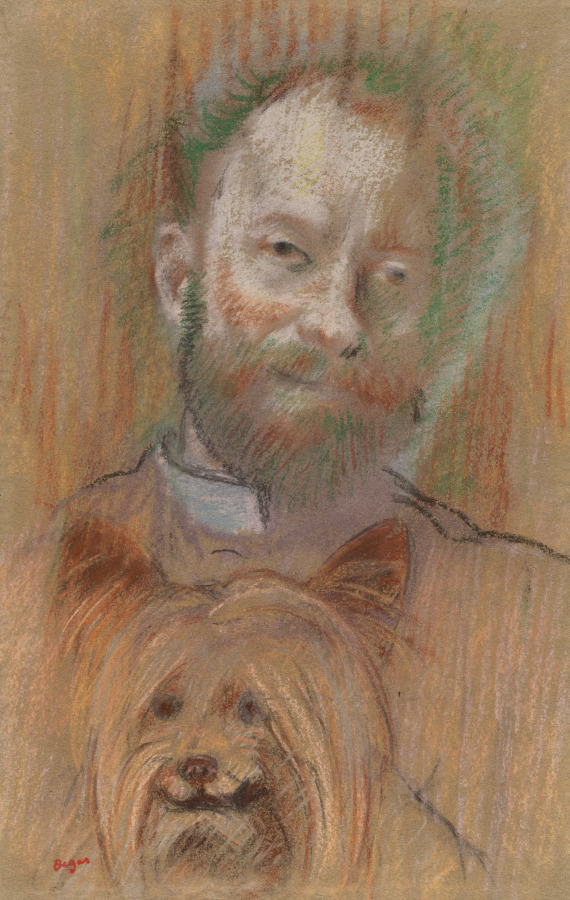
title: Ludovic Lepic Holding His Dog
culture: France, 19th century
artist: Edgar Degas (French, 1834–1917)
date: 1889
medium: pastel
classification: Drawing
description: Degas executed this portrait of his friend, the artist Ludovic Lepic, with rapid and expressive strokes of powdery pastel. The two artists worked together closely in printmaking early on, and this work is one of several commemorative depictions that Degas made throughout his career. Here, Lepic is seen with his pet, a Belgian Griffon, suggesting a fondness for dogs for which he was well-known in late-19th century Paris. He died just about one month after this portrait was completed at the age of 50.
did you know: Scholars have suggested that the unusual tonality of this drawing is due to the fact that it was executed in artificial rather than natural light.